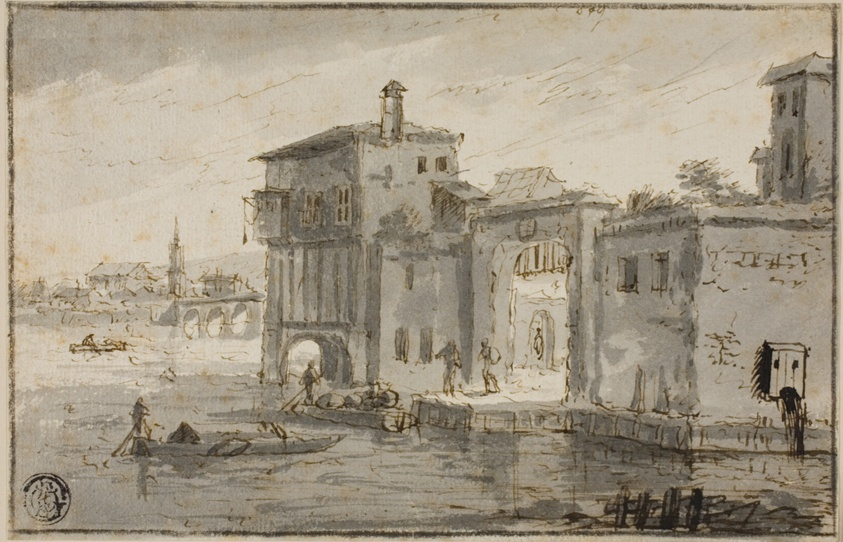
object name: Drawing and Watercolor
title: Buildings Beside Lagoon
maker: Possibly Claude Lorrain; French, 1600-1680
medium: Pen and brown ink, with brush and gray wash, on ivory laid paper, perimter mounted on cream wove card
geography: France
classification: pen and ink drawings; ink or chalk wash; drawings (visual works); prints and drawing; paper